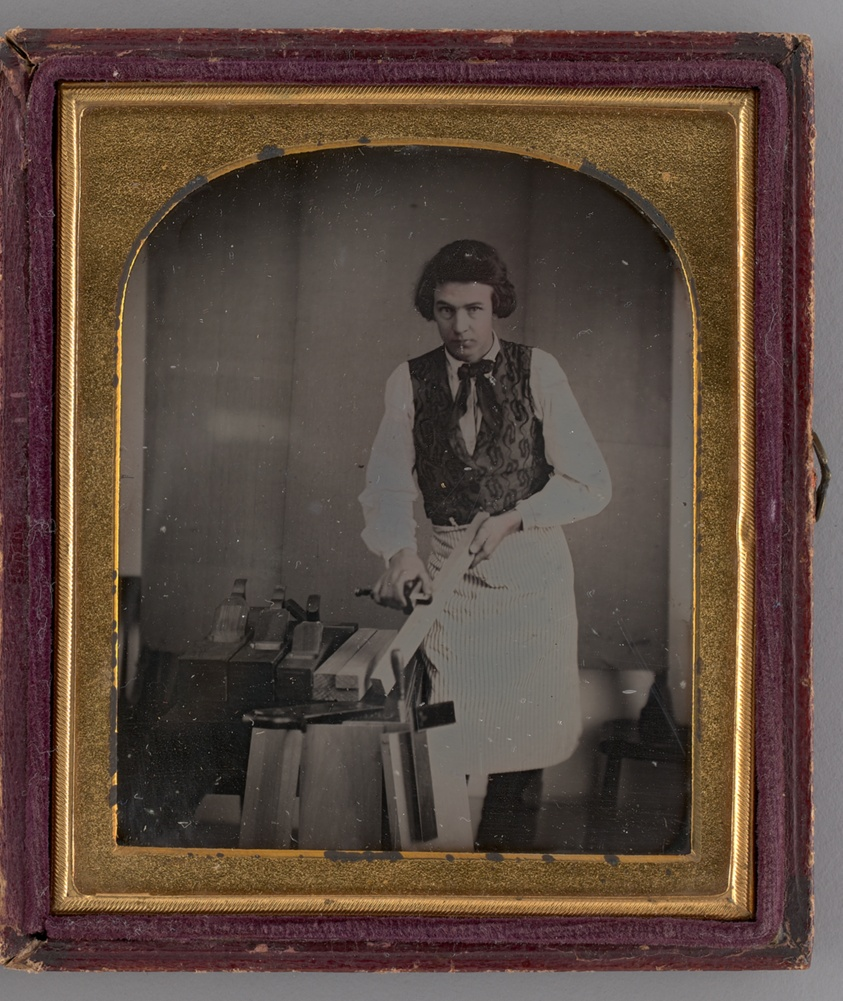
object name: Photograph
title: Untitled (Portrait of a Carpenter)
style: 19th century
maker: Unknown maker; American, 19th century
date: 1850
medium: Daguerreotype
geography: United States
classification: portrait; daguerreotype; portrait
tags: lundberg collection, portrait, portraits, Male, men, portraits: male subject, carpentry